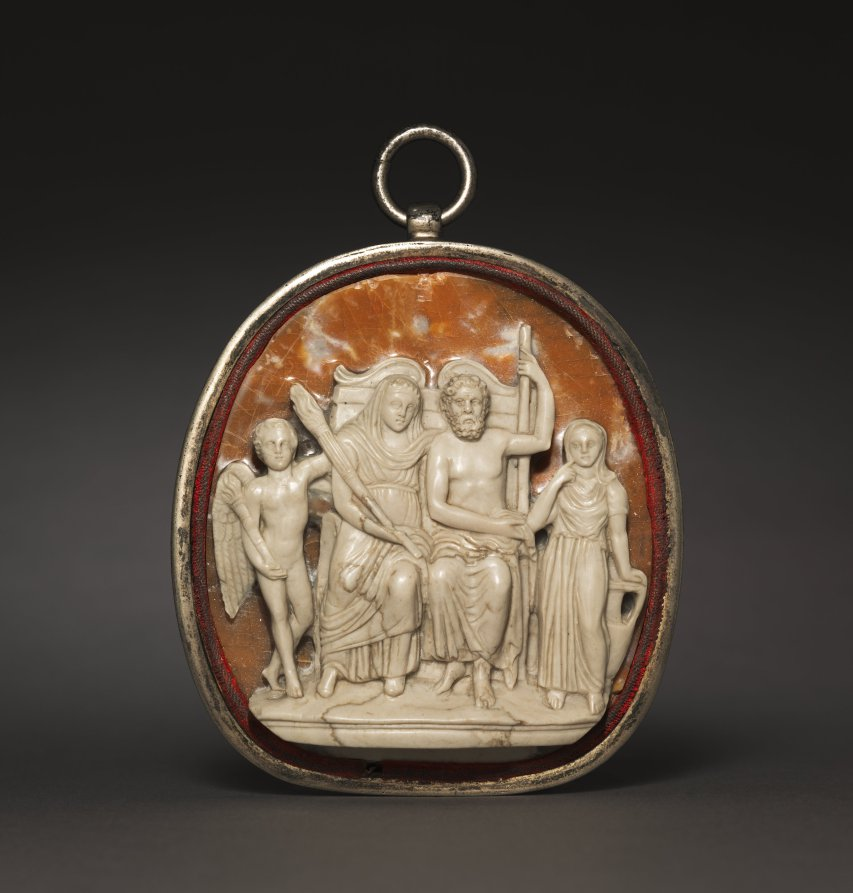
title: Cameo of Zeus and Hera Enthroned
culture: Italy, Roman, style of 2nd Century (forgery)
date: Late 1800s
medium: shell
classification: Jewelry